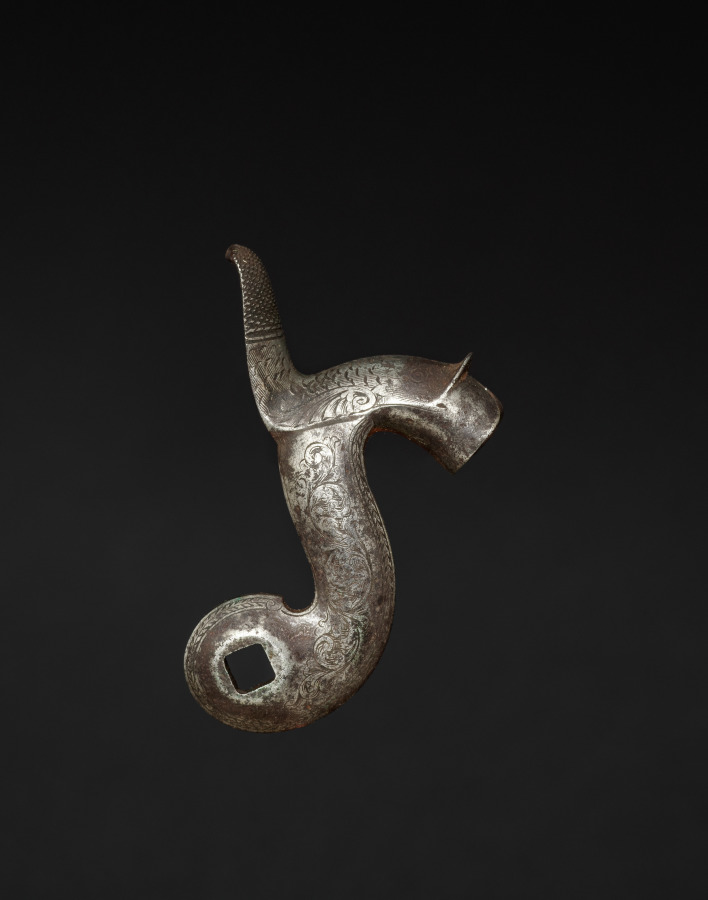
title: Gun-Lock Hammer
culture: England, early 19th century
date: c. 1800–1825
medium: steel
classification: Arms and Armor